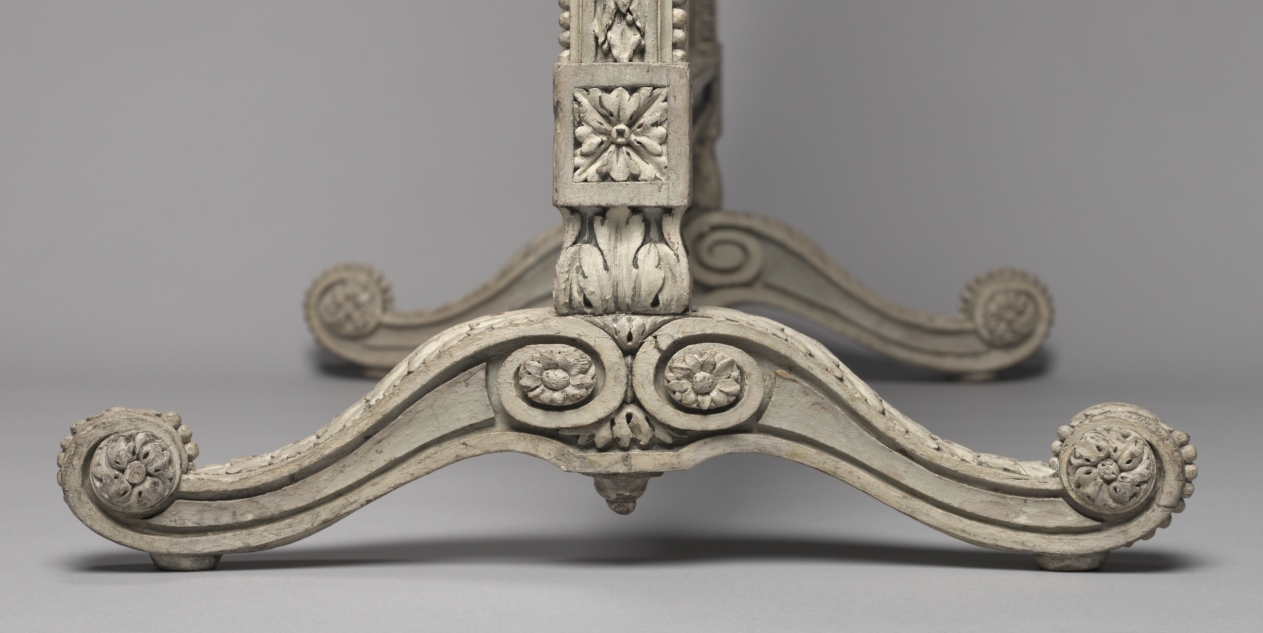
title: Fire Screen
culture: France, Paris, style of Louis XVI, 18th century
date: c. 1785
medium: carved and painted wood with tapestry panel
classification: Furniture and woodwork